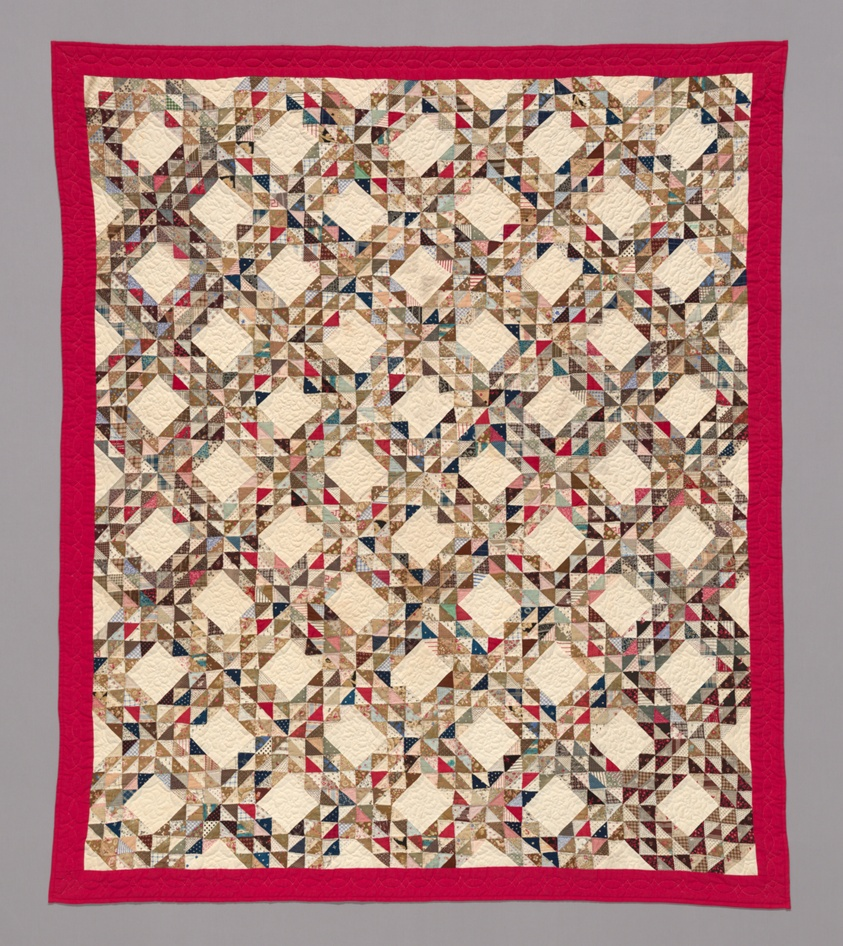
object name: Textile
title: "Ocean Wave" Quilt Bedcover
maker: Made by Frances Brooks Wyld; American, died 1958; United States, Illinois, Chicago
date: c. 1883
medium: Cotton, plain weaves; printed; cotton, twill weaves; pieced; edged and backed with cotton, plain weave; quilted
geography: United States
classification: needlework - quilt; textile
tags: Chicago